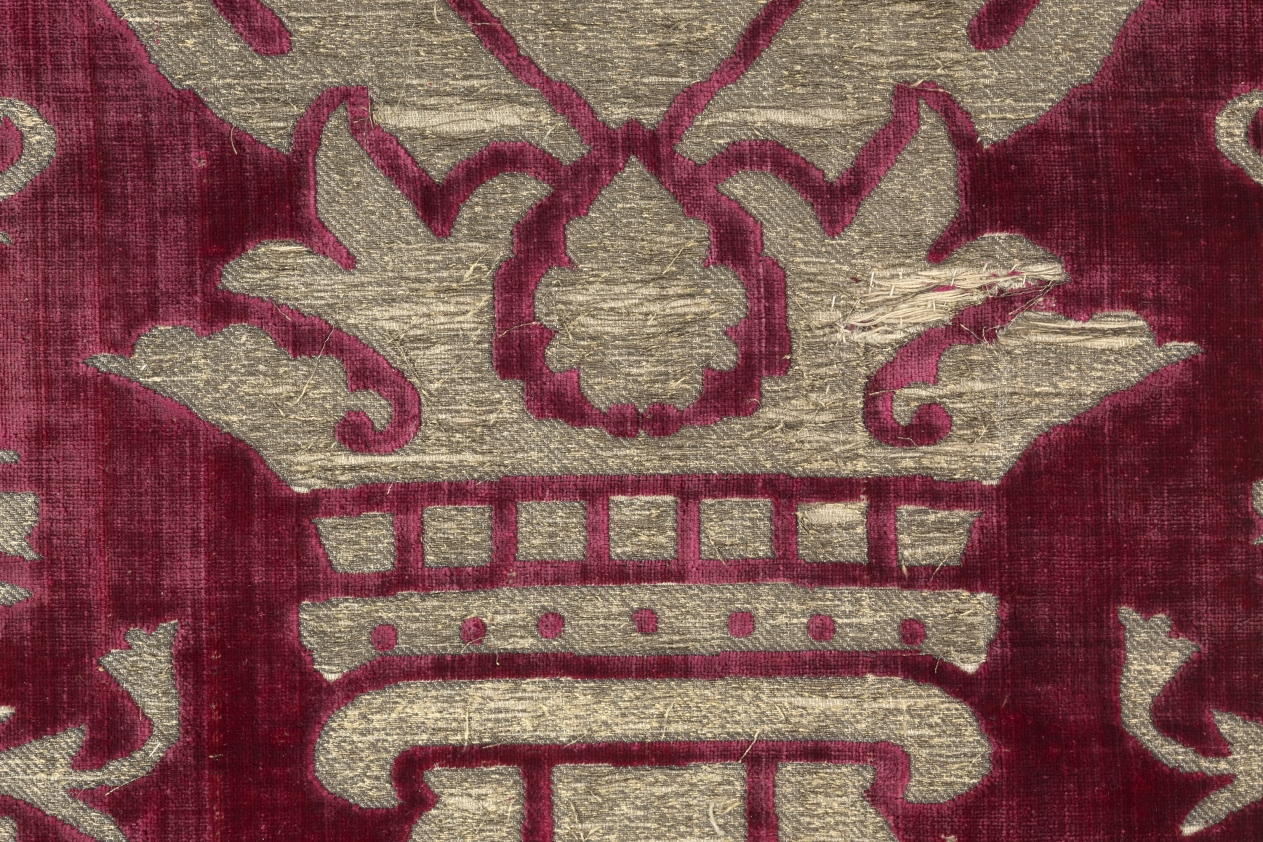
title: Brocaded Velvet Panel with Italianate Pattern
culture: Turkey, Istanbul or Bursa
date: 1575–1625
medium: Silk: velvet, brocaded; gilt-metal thread and cotton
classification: Velvet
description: Rarely are four fabric widths preserved together from any culture. This gilt-metal thread pattern combines Turkish and Italian features: the large ogival (curved) lattice clasped by crowns and the velvet structure are Turkish, and the two so-called artichoke designs are enlarged adaptations of Italian motifs. A symbol of wealth and power, this velvet panel was woven during the artistic height of the Ottoman Empire in the late 1500s. It may have covered a divan (sofa) or possibly enhanced a wall during cold winters in the imperial Topkapi Palace in Istanbul.